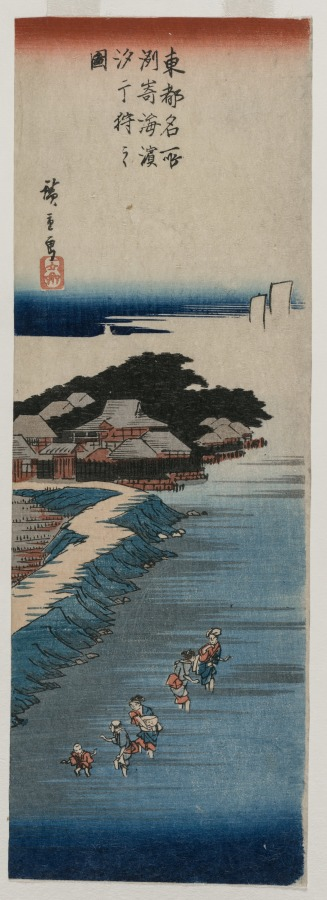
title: Gathering Shells at Low Tide at Susaki; from the series 100 Views of Famous Places in Edo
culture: Japan, Edo period (1615–1868)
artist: Utagawa Hiroshige (Japanese, 1797–1858)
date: 1837–38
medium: color woodblock print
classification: Print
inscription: Seal: Ichiryusai Signature upper left: Hiroshige ga